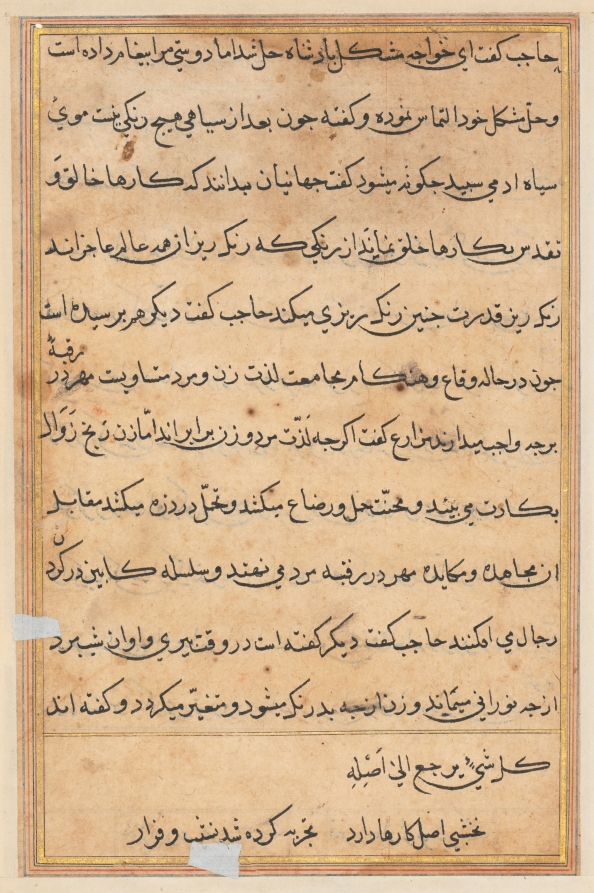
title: Page from Tales of a Parrot (Tuti-nama): text page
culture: Mughal India, court of Akbar (reigned 1556–1605)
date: c. 1560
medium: gum tempera, ink, and gold on paper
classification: Painting